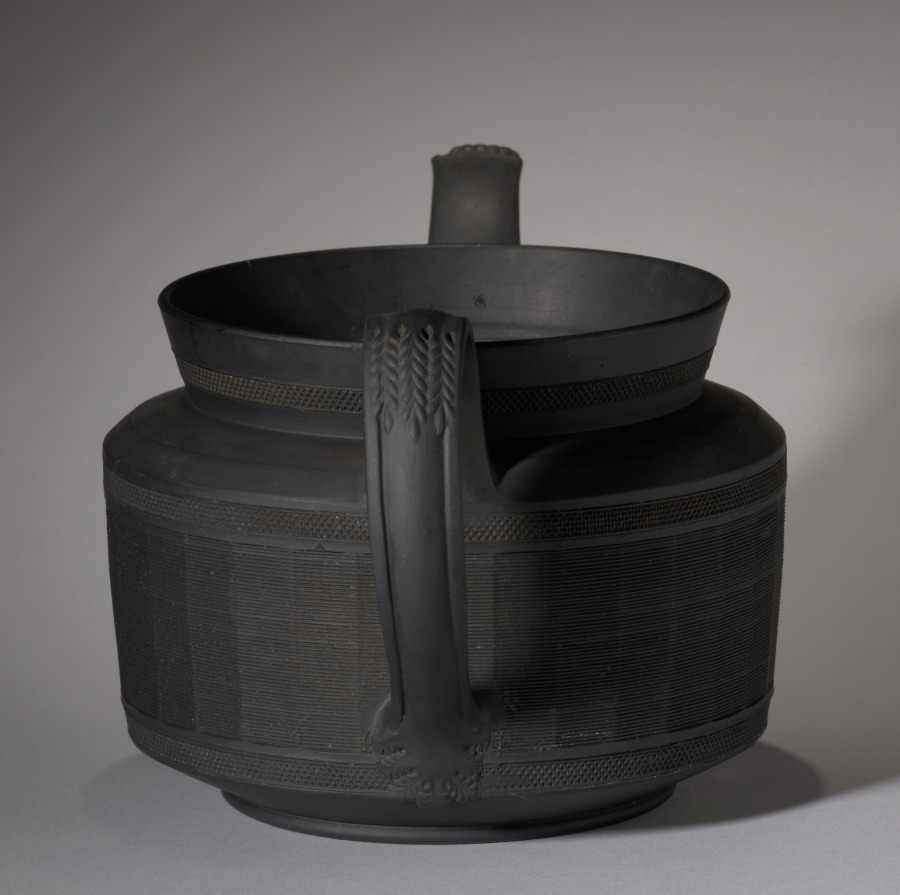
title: Teapot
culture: England, Staffordshire, 19th century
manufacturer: Davenport Pottery and Porcelain Factory (British)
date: 1800s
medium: black basalt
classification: Ceramic